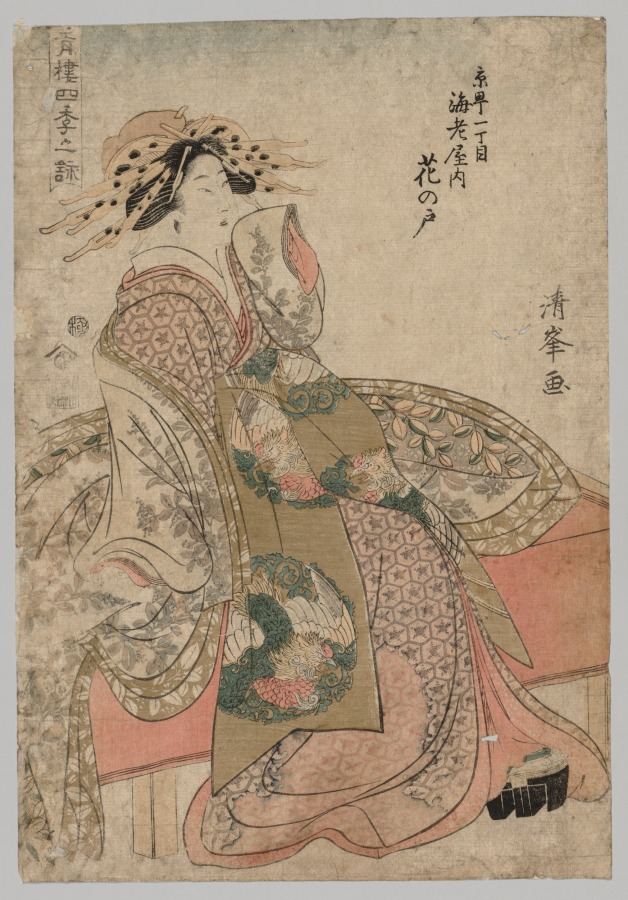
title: Hananoto of the Ebiya in Kyōmachi 1-chome, from the series Songs of the Four Seasons in the Pleasure Quarters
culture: Japan, Edo period (1615–1868)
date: 1690–1730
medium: color woodblock print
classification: Print